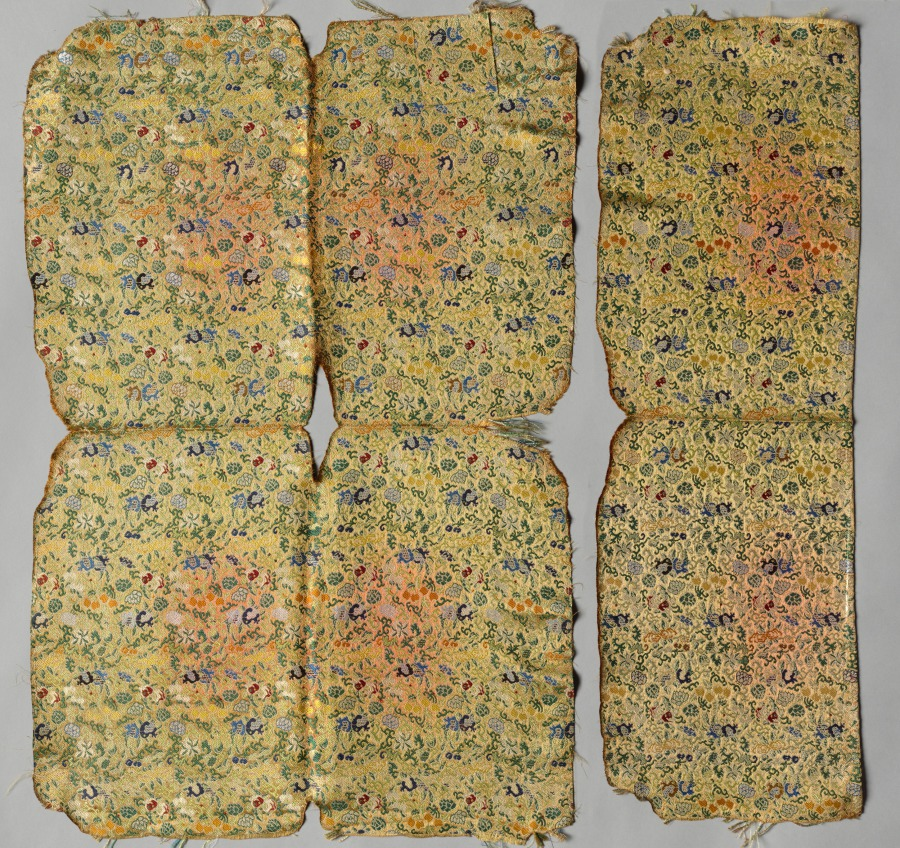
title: Fragments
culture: China, Qing dynasty (1644-1911)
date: 1800s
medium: Silk; damask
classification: Textile